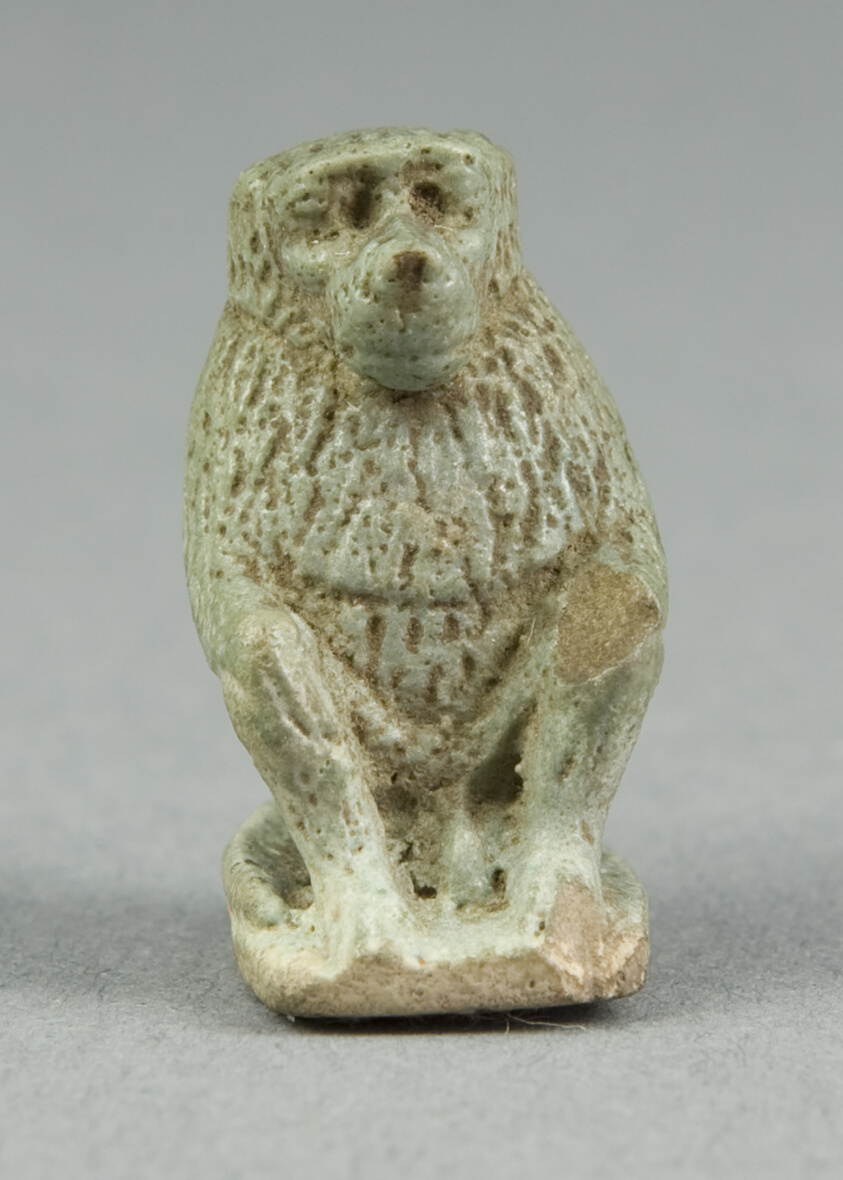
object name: Costume and Accessories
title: Amulet of a Baboon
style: third intermediate period, ancient, egyptian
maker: Egyptian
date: Third Intermediate Period, Dynasty 21–25 (1070–656 BCE)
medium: Faience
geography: Egypt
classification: amulet; jewelry; ceramics; ancient art; costume; faïence (composite material)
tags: baboon, gods (deities), deities